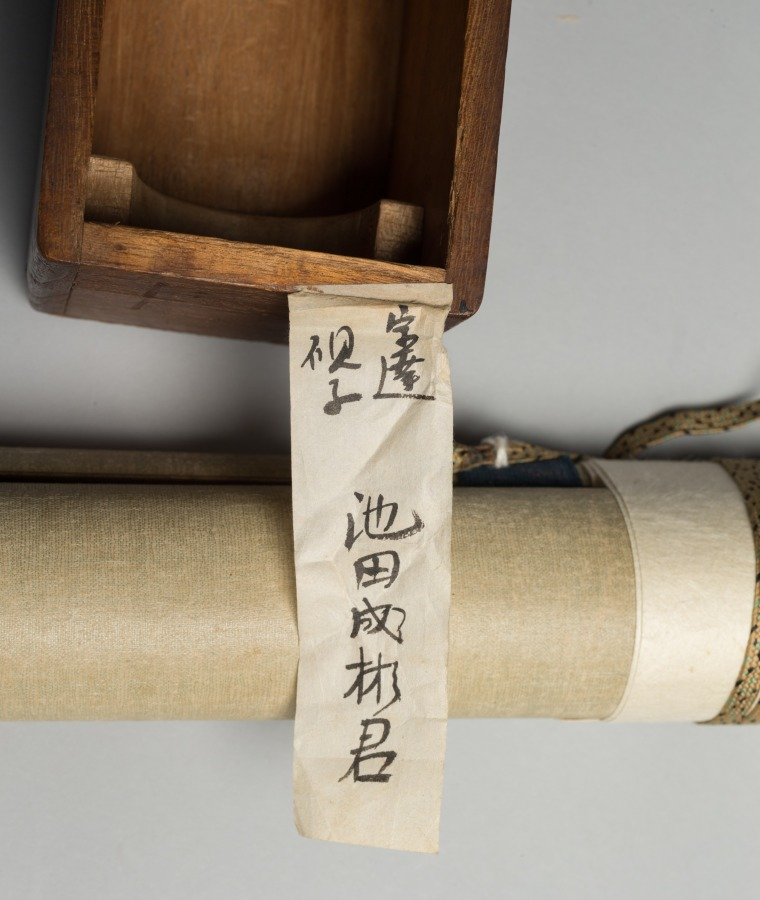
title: Kenshu, Monk with Shrimp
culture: Japan, Edo period (1615–1868)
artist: studio of Tawaraya Sōtatsu (Japanese, c. 1570–c. 1640)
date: c. 1600–1640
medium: hanging scroll; ink on paper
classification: Painting